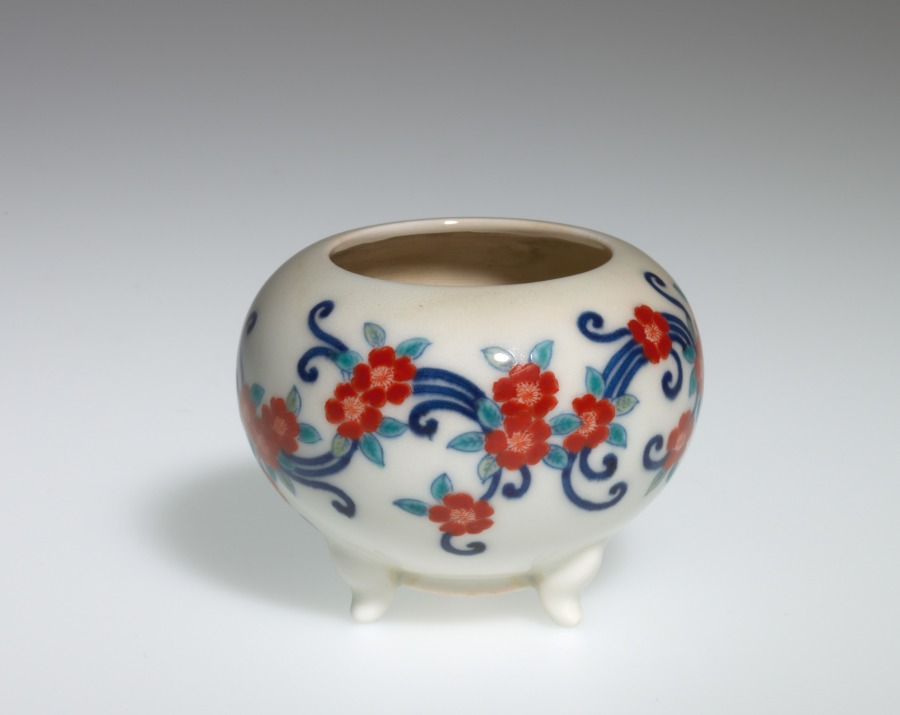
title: Incense Burner with Floral Scroll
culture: Japan, Edo period (1615–1868)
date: early to mid-1800s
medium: Porcelain with underglaze blue and overglaze enamel decoration (Hizen ware, Nabeshima style)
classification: Ceramic